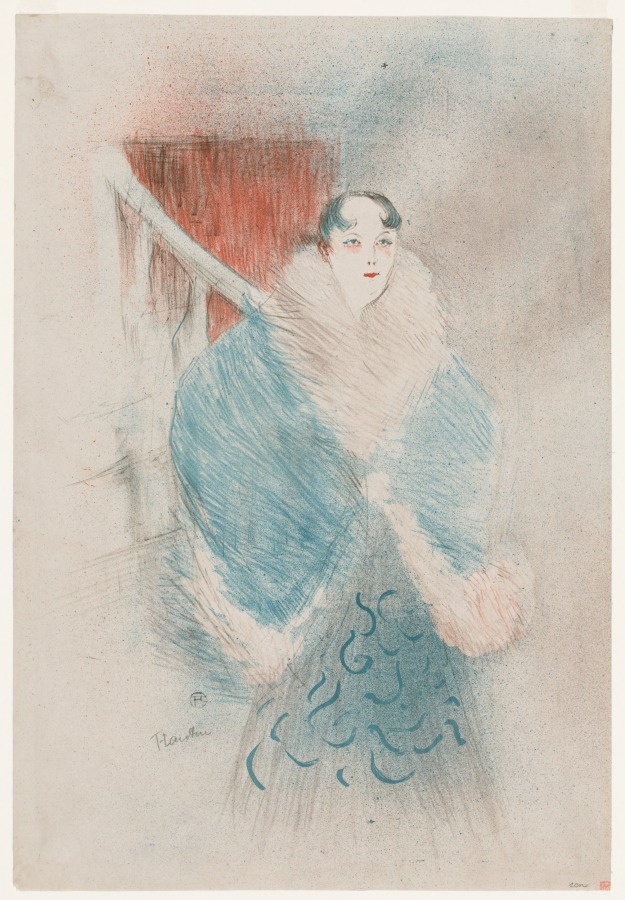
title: Elsa, Dite la Viennoise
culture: France, 19th century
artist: Henri de Toulouse-Lautrec (French, 1864–1901)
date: 1897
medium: color lithograph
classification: Print